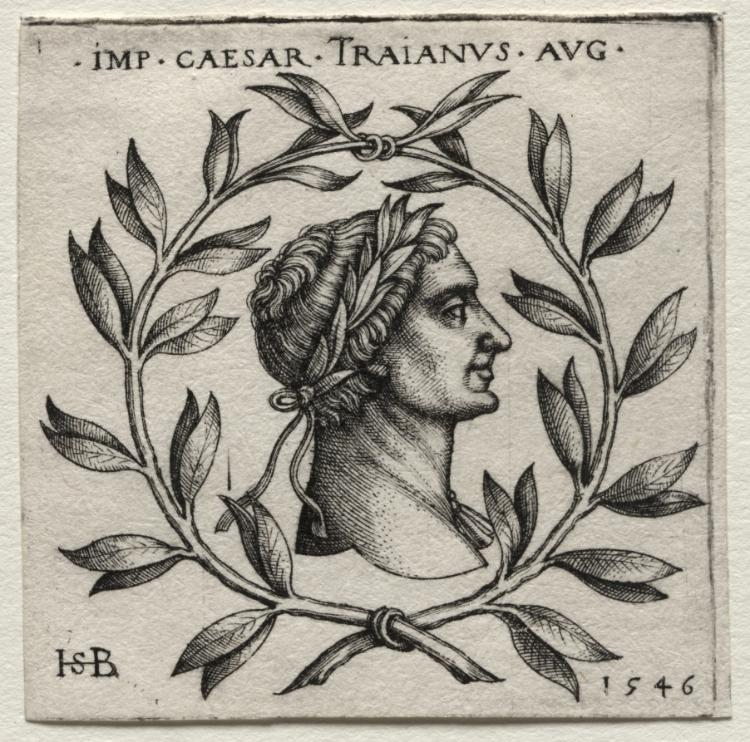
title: Trajan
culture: Germany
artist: Hans Sebald Beham (German, 1500–1550)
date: 1546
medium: engraving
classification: Print